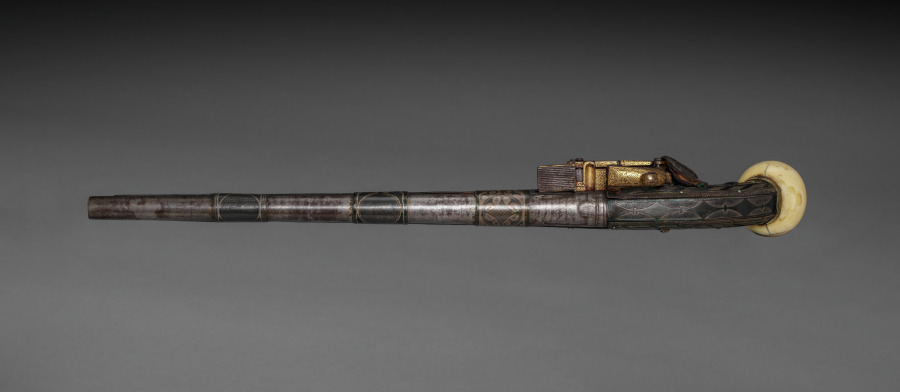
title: Ball-Butted Miquelet-Lock Pistol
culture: Causasus, Daghestan, 19th century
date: c. 1850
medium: steel, silver, gold inlay, leather, ivory ball butt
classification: Arms and Armor